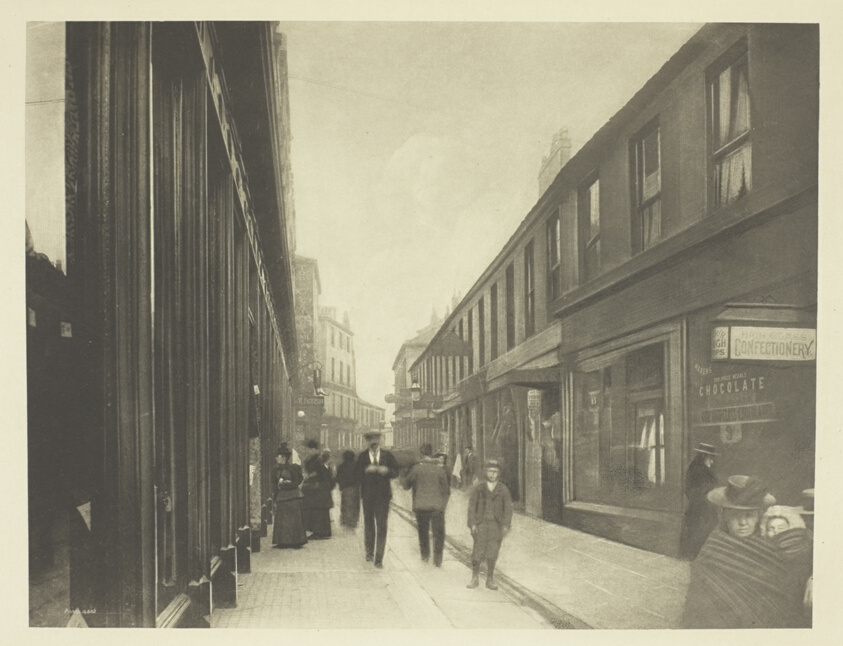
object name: Photograph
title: Nelson Street, City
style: 19th century, Pictorialism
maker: James Craig Annan (Scottish, 1864-1946)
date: 1899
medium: Photogravure, plate 46 from the book "The Old Closes & Streets of Glasgow" (1900)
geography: Scotland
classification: photograph; photography